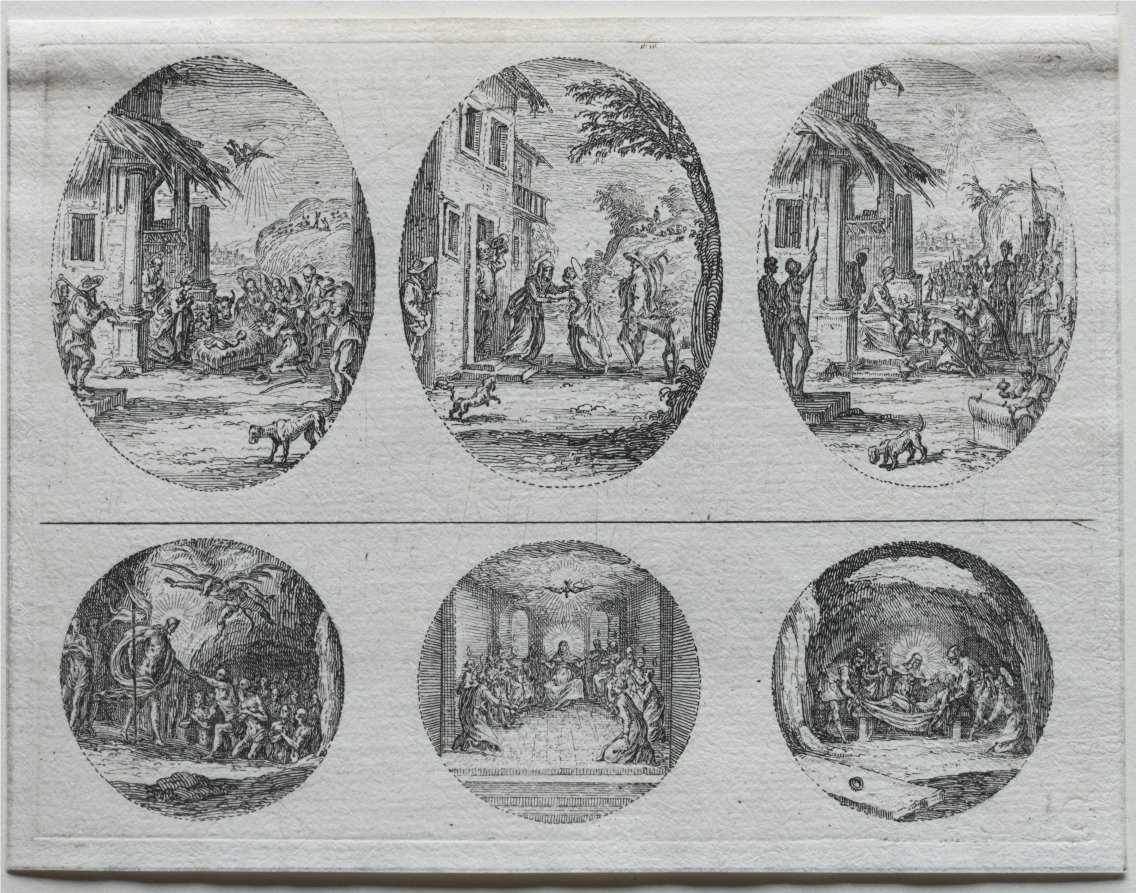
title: The Mysteries of the Passion: The Adoration of the Kings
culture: France, 17th century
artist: Jacques Callot (French, 1592–1635)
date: 1631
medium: etching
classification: Print